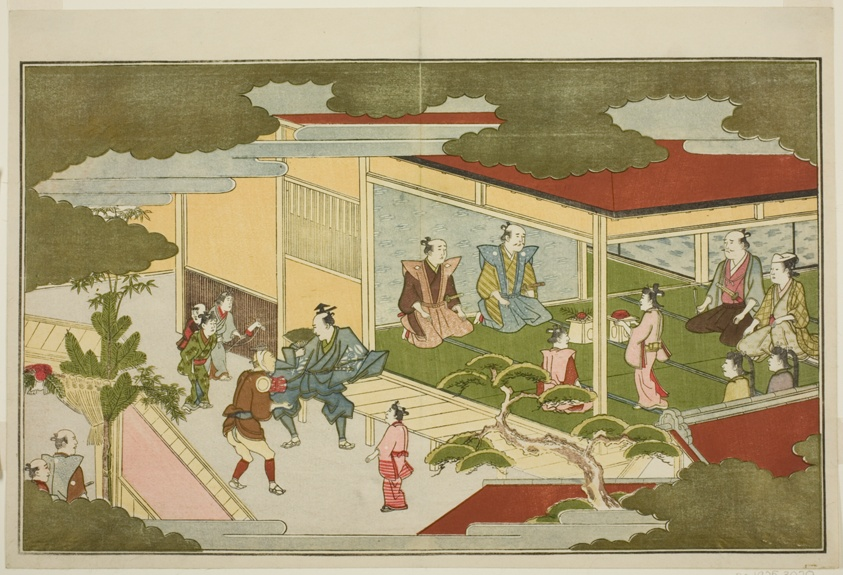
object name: Print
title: New Year in a Samurai Mansion, from the illustrated kyoka anthology "The Young God Ebisu (Waka Ebisu)"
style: Japanese (culture or style)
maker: Kitagawa Utamaro 喜多川 歌麿; Japanese, 1753 (?)-1806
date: New Year, 1789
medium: Color woodblock print; double-page illustration from album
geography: Japan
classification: woodblock print; print; asian art